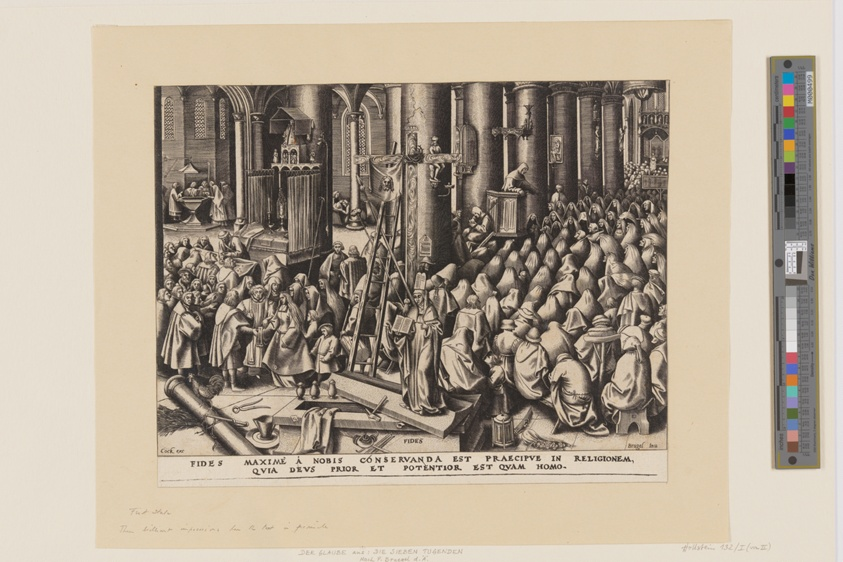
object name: Print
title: Faith, from The Seven Virtues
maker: Philip Galle (Flemish, 1537–1612); after Pieter Bruegel, the elder (Flemish, c. 1525–1569); published by Hieronymus Cock (Netherlandish, c. 1510–1570)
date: 1559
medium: Engraving on ivory laid paper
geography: Flanders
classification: engraving; paper; print; prints and drawing